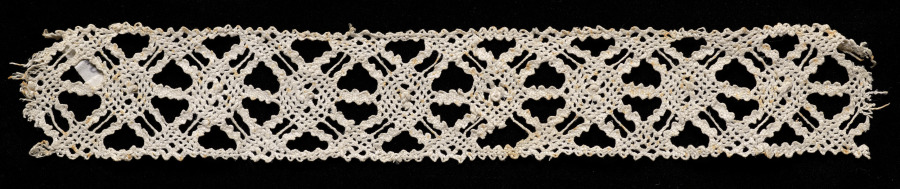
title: Lace Insertion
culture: Italy, Venice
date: 1540–60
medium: Bobbin lace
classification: Lace